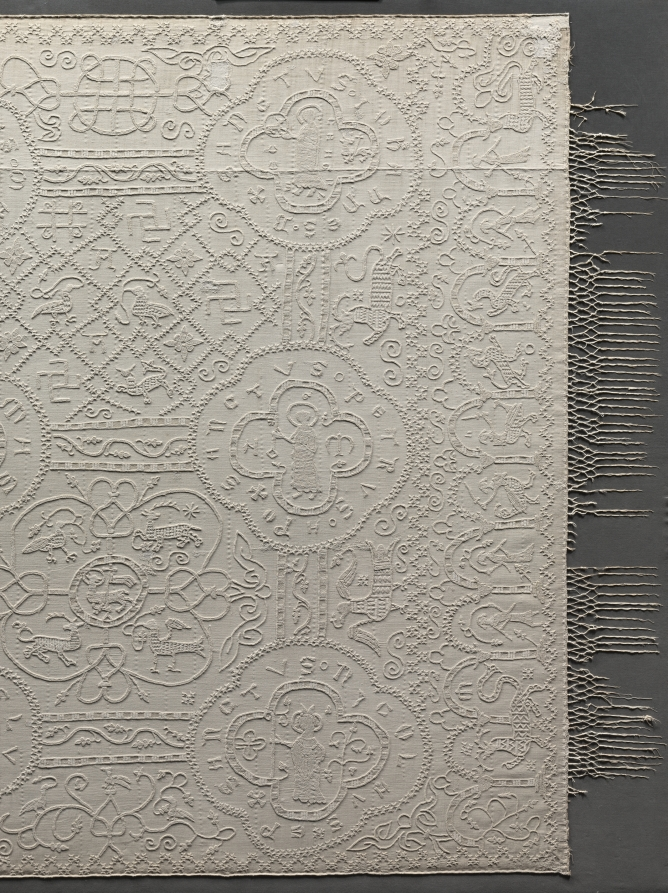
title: Altar Cloth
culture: Germany, Altenberg on the Lahn, Premonstratensian Convent, 14th century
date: c. 1350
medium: embroidery: linen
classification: Embroidery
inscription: various motifs enclosed in quatrefoils with identifying inscriptions in Gothic letters.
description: This large, embroidered altar cloth is one of the rarest, most important medieval church furnishings in existence. It was stitched by nuns in the Premonstratensian Convent in Altenberg on the Lahn River, north of Frankfurt, Germany, and was used to cover the church’s high altar in the weeks leading up to Easter. The cloth is an example of linen embroidery, a specialty of German nuns in the later Middle Ages. The Altenberg monastery church once had valuable furnishings; the high altar retable (a decorated frame with sculptures and paintings on the top of an altar) has survived, the main parts of which are now in the Städel Museum in Frankfurt, Germany.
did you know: When lit from behind, the previously hidden details emerge and the complex design becomes evident.